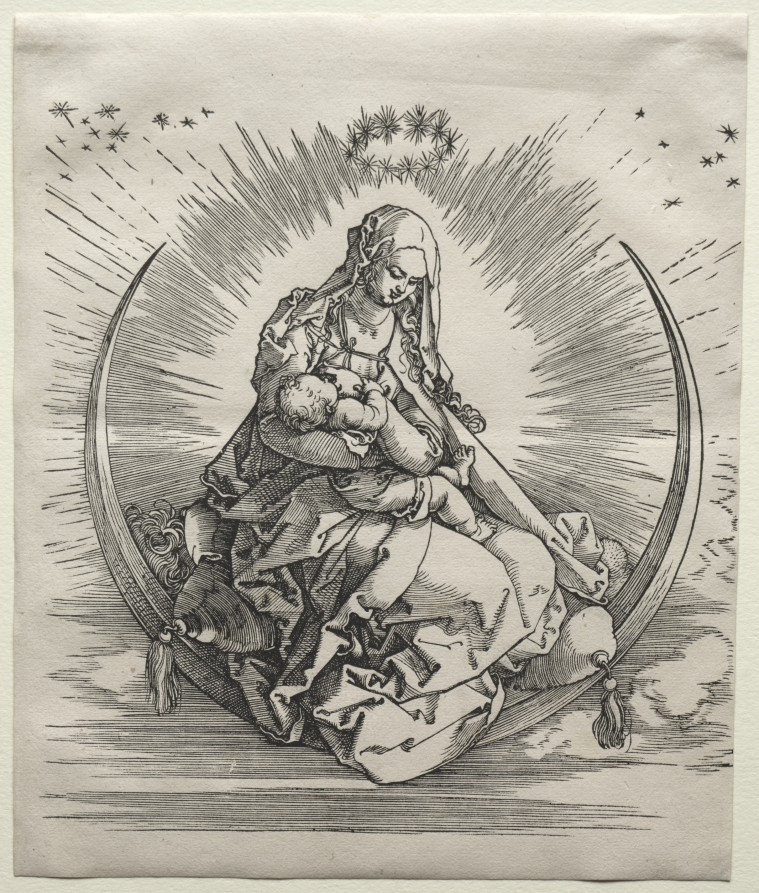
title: The Virgin on a Crescent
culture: Germany, early 16th Century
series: The Life of the Virgin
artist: Albrecht Dürer (German, 1471–1528)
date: c. 1510–11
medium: woodcut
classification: Print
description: The frontispiece of the series is a modification of the devotional imagery Dürer used in his depictions of the Virgin and Child standing in a crescent moon. Here, he also incorporated the themes of the nursing Madonna and the Madonna of Humility, often shown seated. In doing so, Dürer fused the Virgin’s regal, motherly, and humble natures into one striking image.